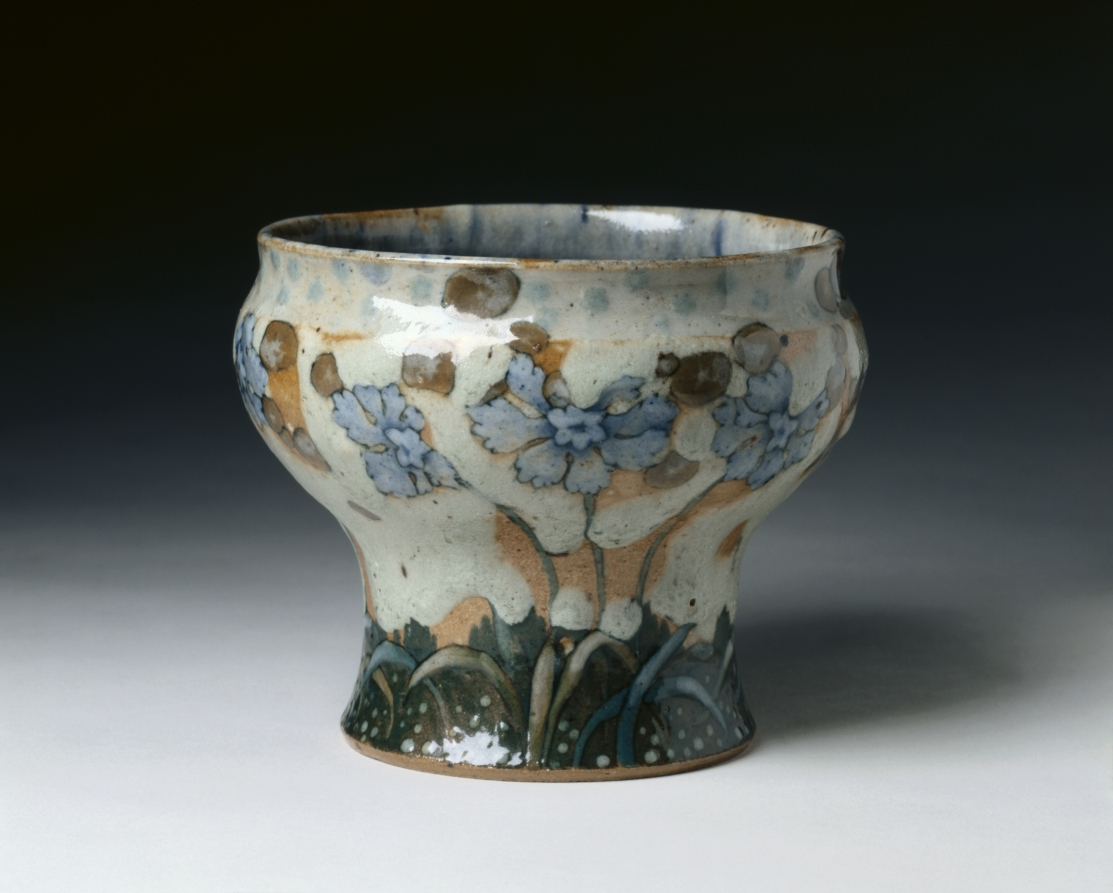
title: Bowl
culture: France, 19th century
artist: Albert Louis Dammouse (French)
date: c. 1900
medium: stoneware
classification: Ceramic